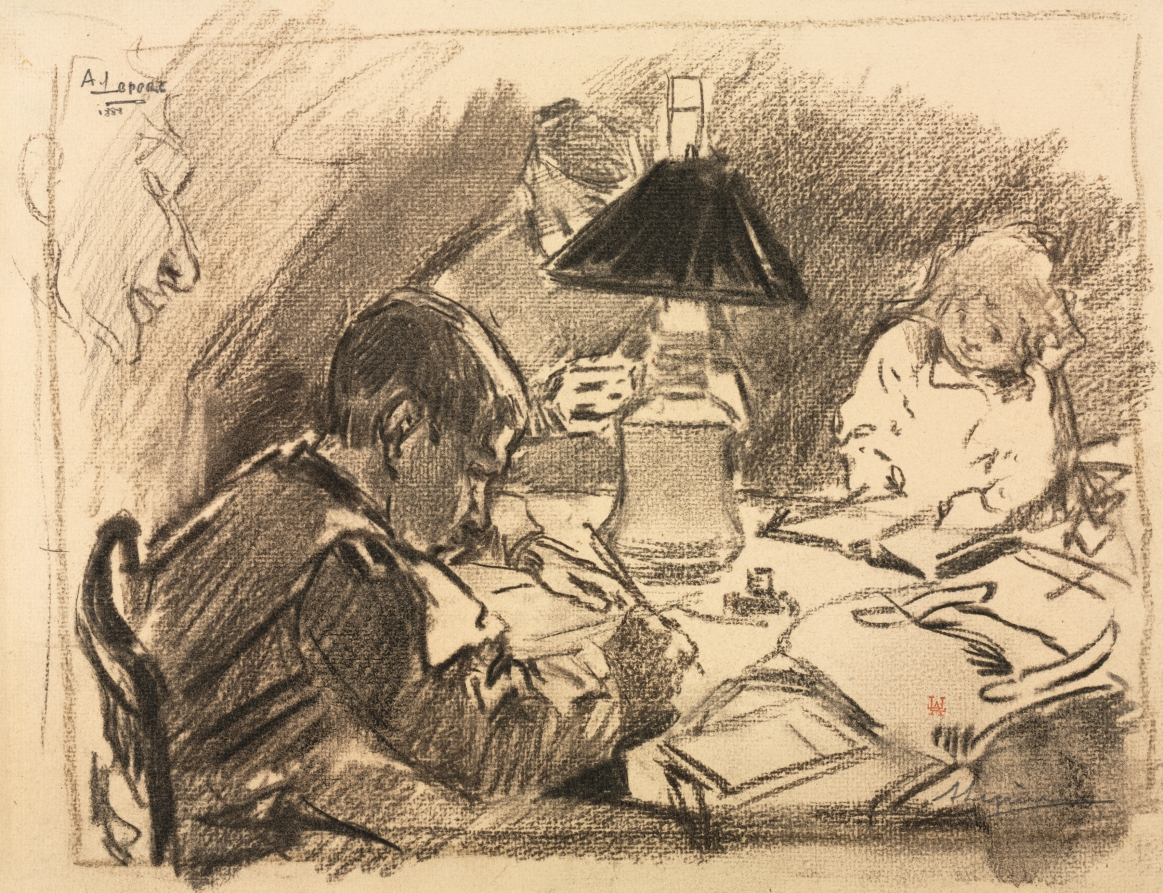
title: Study for the lithograph 'Around the Lamp'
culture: France, 19th century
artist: Auguste Louis Lepère (French, 1849–1918)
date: 1888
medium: charcoal, with stumping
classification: Drawing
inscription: signed, upper left, in graphite: A. Lepére [partially underlined] / 1888 ; signed, lower right, in red ink: [artist's stamp: LAL] (Lugt 141) ; signed, lower right, in graphite: A.Lepére [underlined] ; lower right, in graphite: 4 ; VERSO, lower left, in graphite: autour de la lampe ; lower center in graphite: 12/6/18 Uy ; lower right, in graphite: Croquis [ayant dessiné de litho exécuté?] / au [illegible] !!! [ouf?] ; lower right, in graphite: [nace ?]